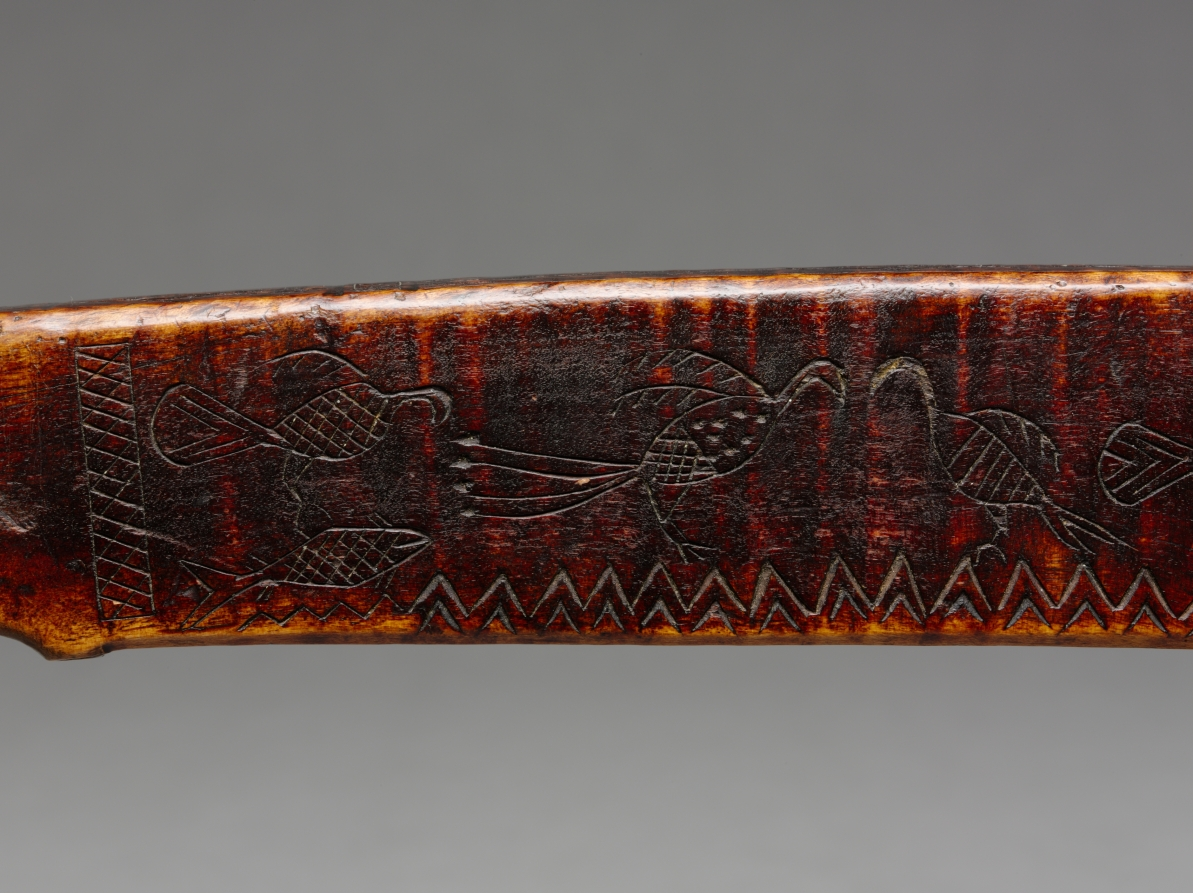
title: Ball-Headed War Club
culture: Native North America, Northeastern Woodlands, Great Lakes, Anishinaabe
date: late 1700s–early 1800s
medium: wood (maple?)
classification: Implements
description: The ball at the striking end of this club is clenched in an abstract, jawlike form that likely refers to a protector animal who endowed the owner with power. Incised on the shaft is a rich record of doodemag (singular, doodem, “totem”)—animals representing other-than-human progenitors from which Anishinaabe peoples trace their descent. (The Anishinaabeg, a group of related Great Lakes nations, include the Odawa, Ojibwe, Potawatomi, and others.) Included is an antlered creature, perhaps a caribou, along with mammals, birds, and powerful spirit beings: the thunderbird, its wings outstretched, and perhaps the long-tailed underwater panther. When this example was made, clubs had become symbols of status and earlier ways of life, having been replaced as favored weapons by metal tomahawks and European firearms. Today, clubs are part of powwow regalia.